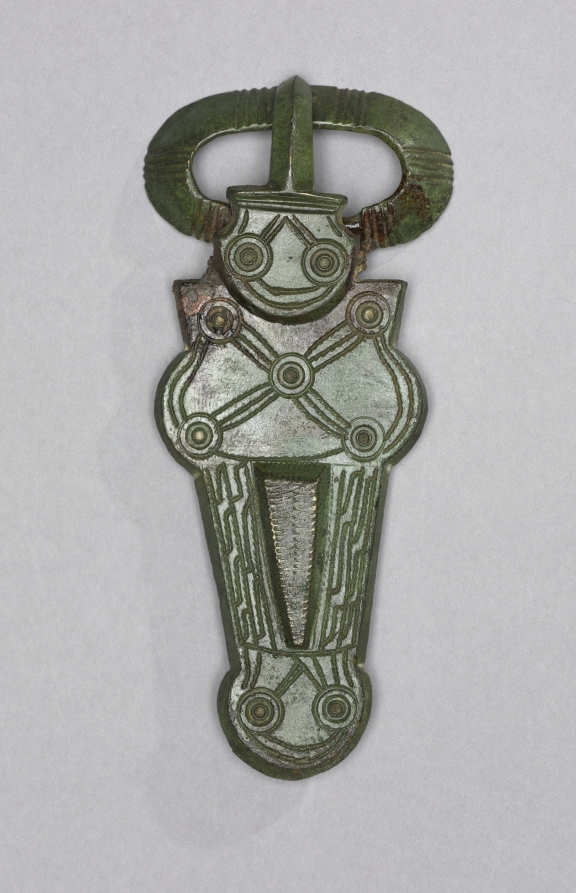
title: Buckle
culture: Frankish(?), Migration period, 6th century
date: 500s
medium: brass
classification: Jewelry